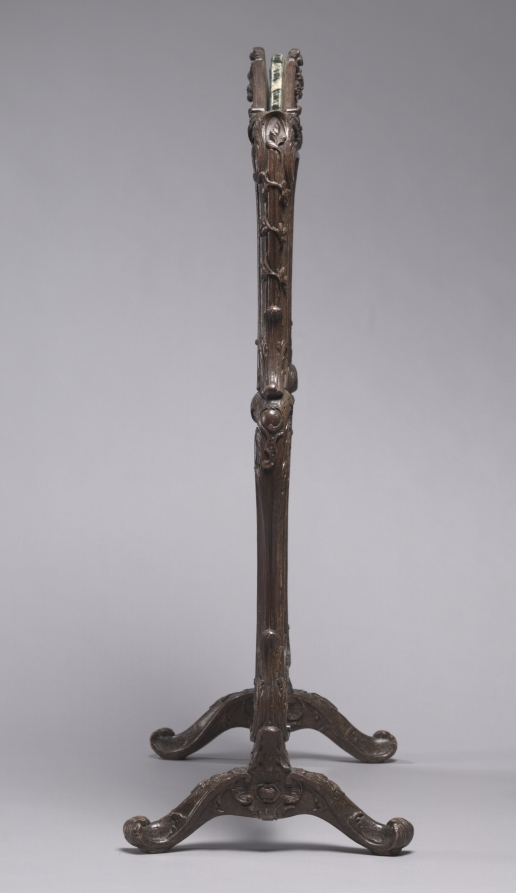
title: Fire Screen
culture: France, 18th century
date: c. 1750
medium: wood and velvet panel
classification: Furniture and woodwork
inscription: inscribed beneath in three places: 32.